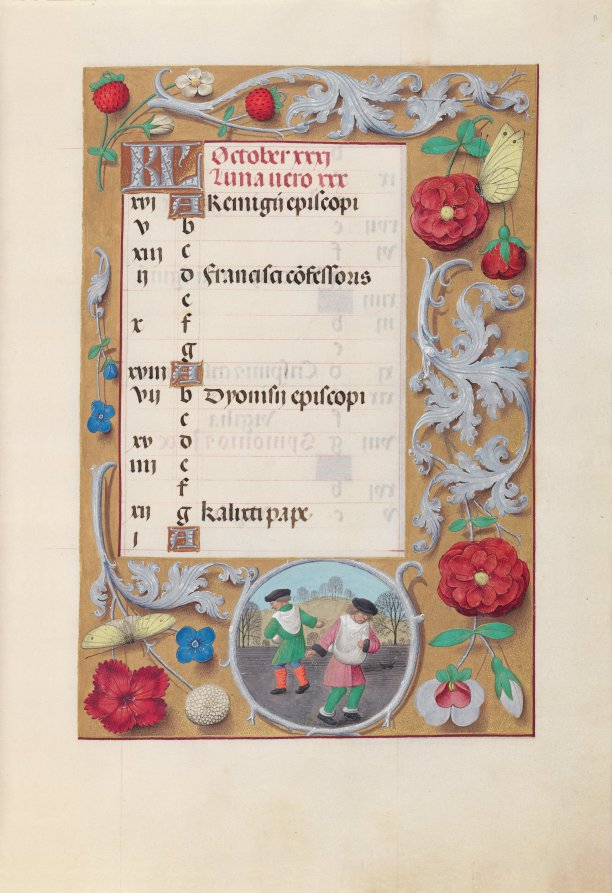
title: Hours of Queen Isabella the Catholic, Queen of Spain: Fol. 11r, October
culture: Flanders, Ghent and Bruges, late 15th century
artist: Master of the First Prayerbook of Maximillian (Flemish, c. 1444–1519)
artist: and Associates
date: c. 1500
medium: ink, tempera, and gold on vellum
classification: Bound Volume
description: This manuscript was illuminated by a circle of at least five highly organized manuscript painters active in the Flemish cities of Ghent and Bruges. The principal illuminator was Alexander Bening, who painted the majority of the book's miniatures. Manuscripts produced by this circle of artists are renowned for the decoration of their borders, which typically feature a rich variety of realistically-painted flowers, birds, and butterflies. This prayer book, called a book of hours, was intended not for a cleric, but for the private devotions of a lay person-in this case, Isabella the Catholic, Queen of Spain (1451-1504). Isabella's coat of arms embellishes the book's frontispiece. It is unlikely that the book was commissioned by the Queen herself; rather, she probably received it as a diplomatic gift from someone courting her patronage, perhaps Cardinal Francisco Jimenez de Cisneros. A Franciscan friar, Jimenez was dependent upon Isabella for his advancement, first to the post of Queen's confessor in 1492, and then to Archbishop of Toledo in 1495.